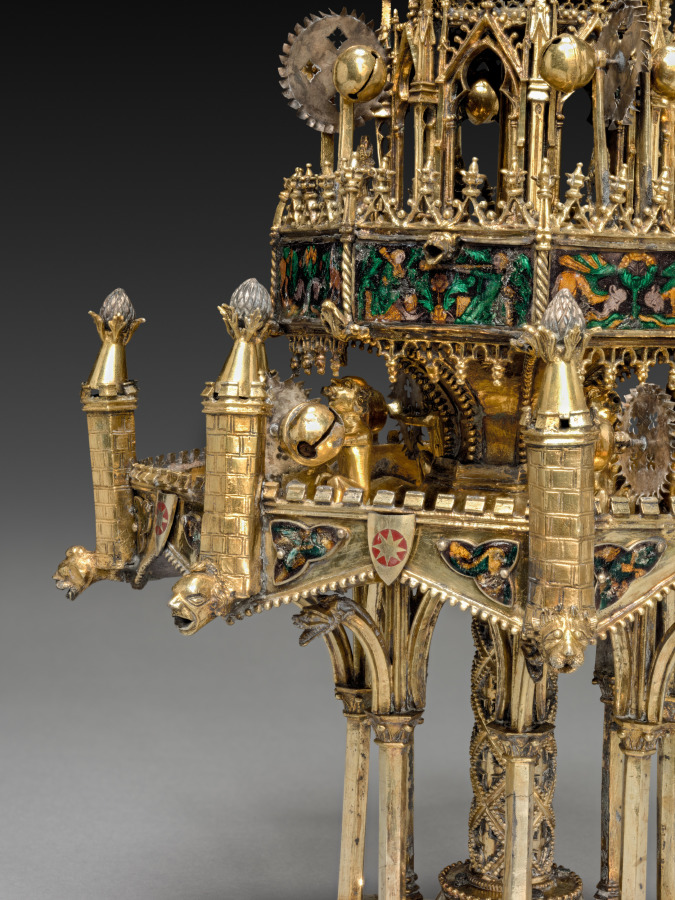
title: Table Fountain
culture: France, Paris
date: c. 1320–40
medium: gilt-silver and translucent enamels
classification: Metalwork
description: Conceptually and stylistically, this object is beyond all else a piece of Gothic architecture in miniature with vaults, pinnacles, columns, and traceried arches. Though the artist who created it is unknown, he was unquestionably inspired by the great Gothic buildings of his time. The table fountain is a three-tiered assembly combining cast elements with bent sheets of gilt-silver. To these have been attached a series of enamel plaques representing grotesque figures, some of which play musical instruments. Water wheels and bells were added to capture motion and sound. The rich detail, precious materials, and involved ornamentation of this deluxe object suggest it would have been expensive to produce and highly treasured by its original owner, someone of high status, and would have been deployed as an object of spectacle. This is the most complete example of its type known to survive from the Middle Ages. Medieval inventories reveal that small fountains like this, often taking various forms, and generally made from precious metals, once existed in large numbers, thus making the Cleveland table fountain an extremely rare object.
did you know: This fountain with its minute architectural details and finely made enamel plaques displayed the wealth and refinement of the owner as it entertained his guests. Imagine hearing the ringing of the tiny bells when this fountain was in use.